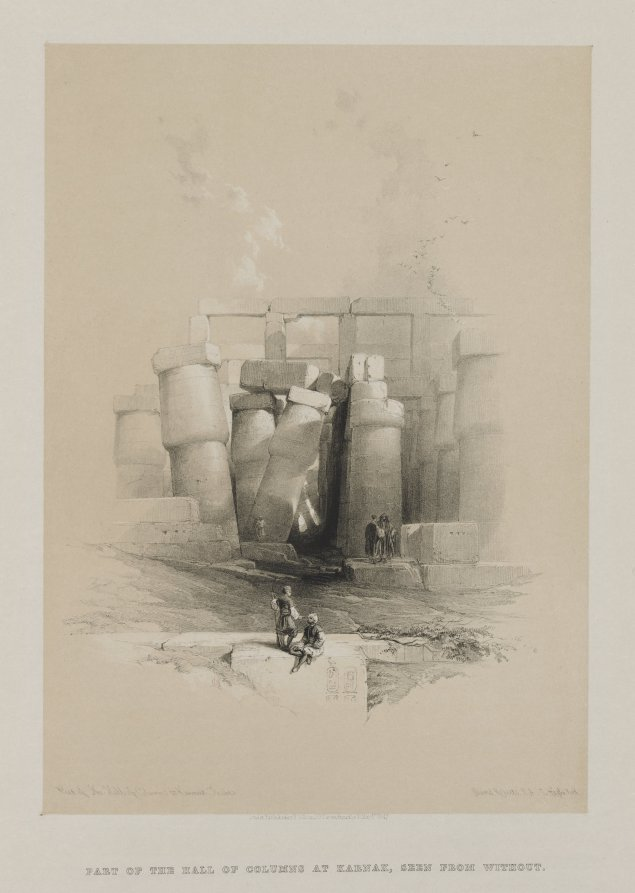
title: Egypt and Nubia, Volume II: Part of the Hall of Columns at Karnak, Thebes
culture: England, 19th century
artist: Louis Haghe (British, 1806–1885)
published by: F. G. Moon, 20 Threadneedle Street, London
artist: after David Roberts (Scottish, 1796–1864)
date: 1847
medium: color lithograph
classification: Print